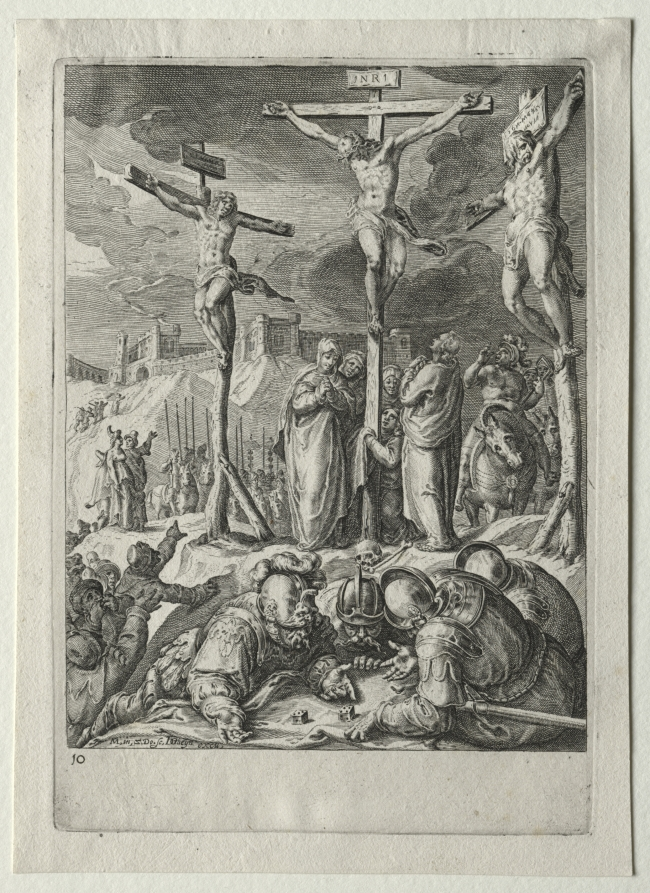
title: Passion Set: The Crucifixion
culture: Netherlands, 16th century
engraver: Zacharias Dolendo (Dutch, 1561–1604)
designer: after Karel van Mander I (Dutch, 1548–1606)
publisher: Jacob de Gheyn II (Netherlandish, 1565–1629)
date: 1596–98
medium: engraving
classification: Print